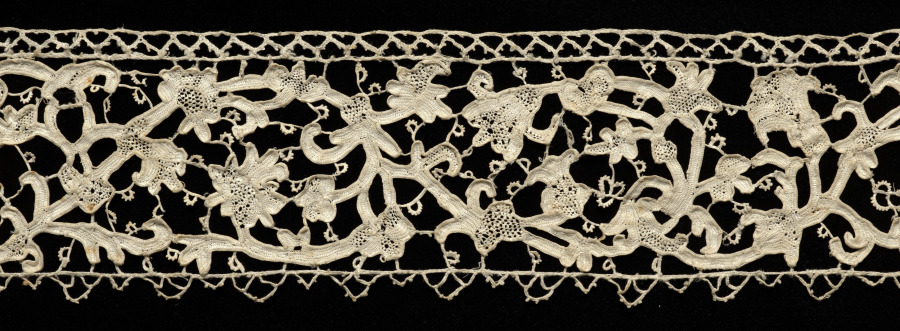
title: Lace Edging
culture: Italy, Venice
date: 1660–99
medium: Needle lace (Venetian flat point)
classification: Lace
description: This fragment of Venetian Flat Point needle lace features a free-running scroll pattern.